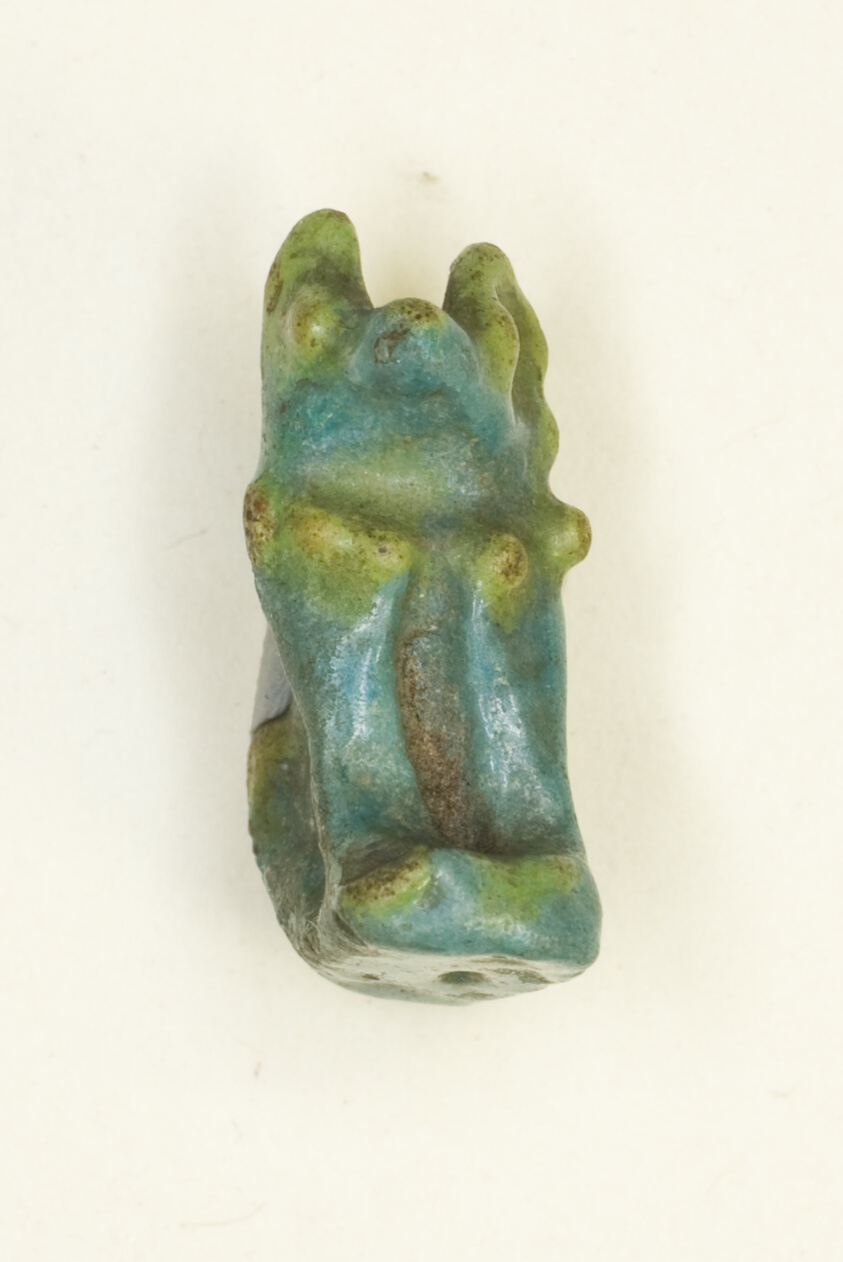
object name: Costume and Accessories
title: Amulet of the Goddess Bastet as a Seated Cat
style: egyptian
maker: Egyptian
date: Late Period (?) (about 664–332 BCE)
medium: Faience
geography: Egypt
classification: amulet; jewelry; glass; ancient art; costume; faïence (composite material)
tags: goddesses